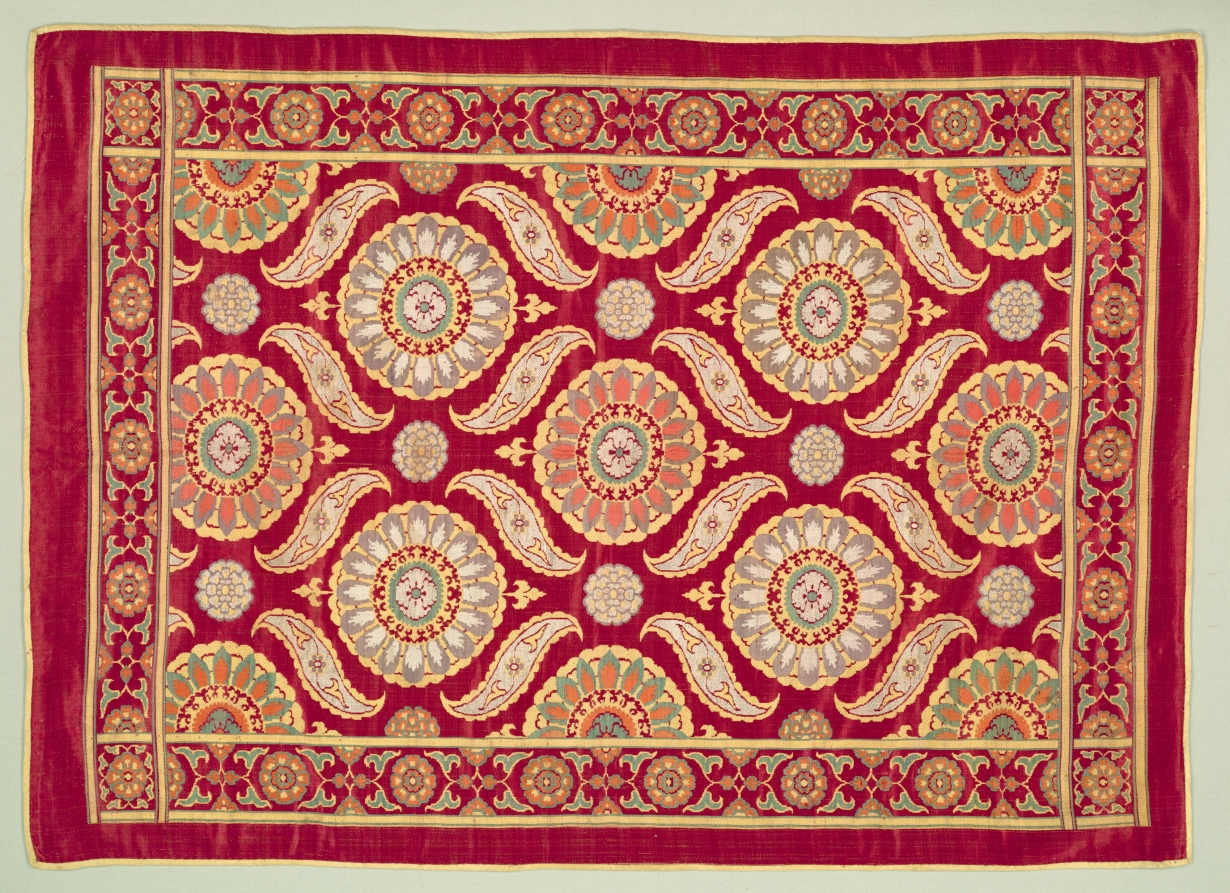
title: Cover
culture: Turkey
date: 1500s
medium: compound weave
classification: Textile